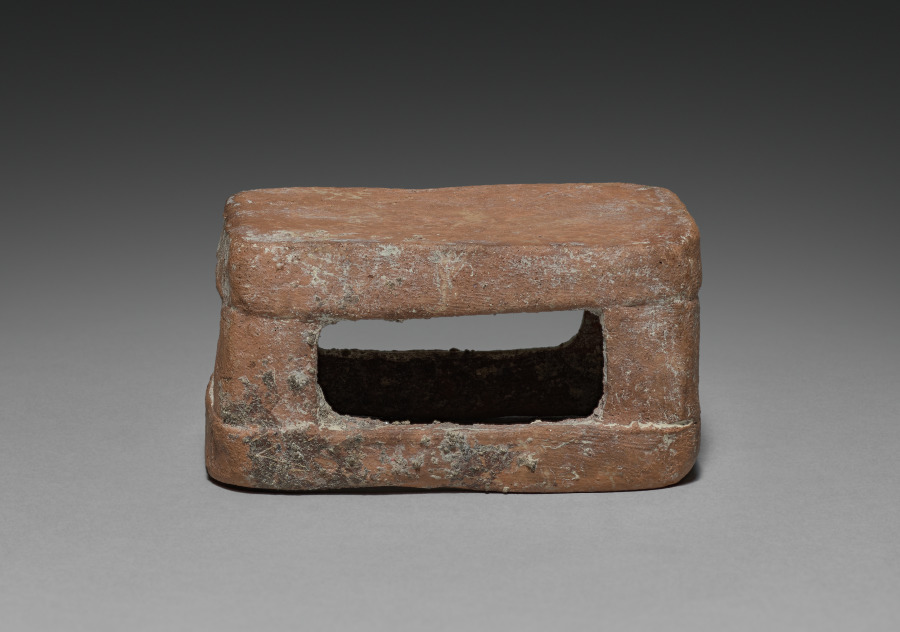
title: Seated Lord with Removable Headdress: Stool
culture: Mesoamerica, Maya, probably Jaina Island, Late Classical period, 7th-9th century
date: 600–800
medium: ceramic and slip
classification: Ceramic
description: The major Maya grave offerings on Jaina Island were ceramic figurines that depict deities and humans in a variety of roles. The stool belongs to a seated figure who represents a male, perhaps another warrior, who wears a huge zoomorphic headdress.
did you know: It is estimated that some 20,000 people were buried on the tiny island of Jaina over a 500-year period.